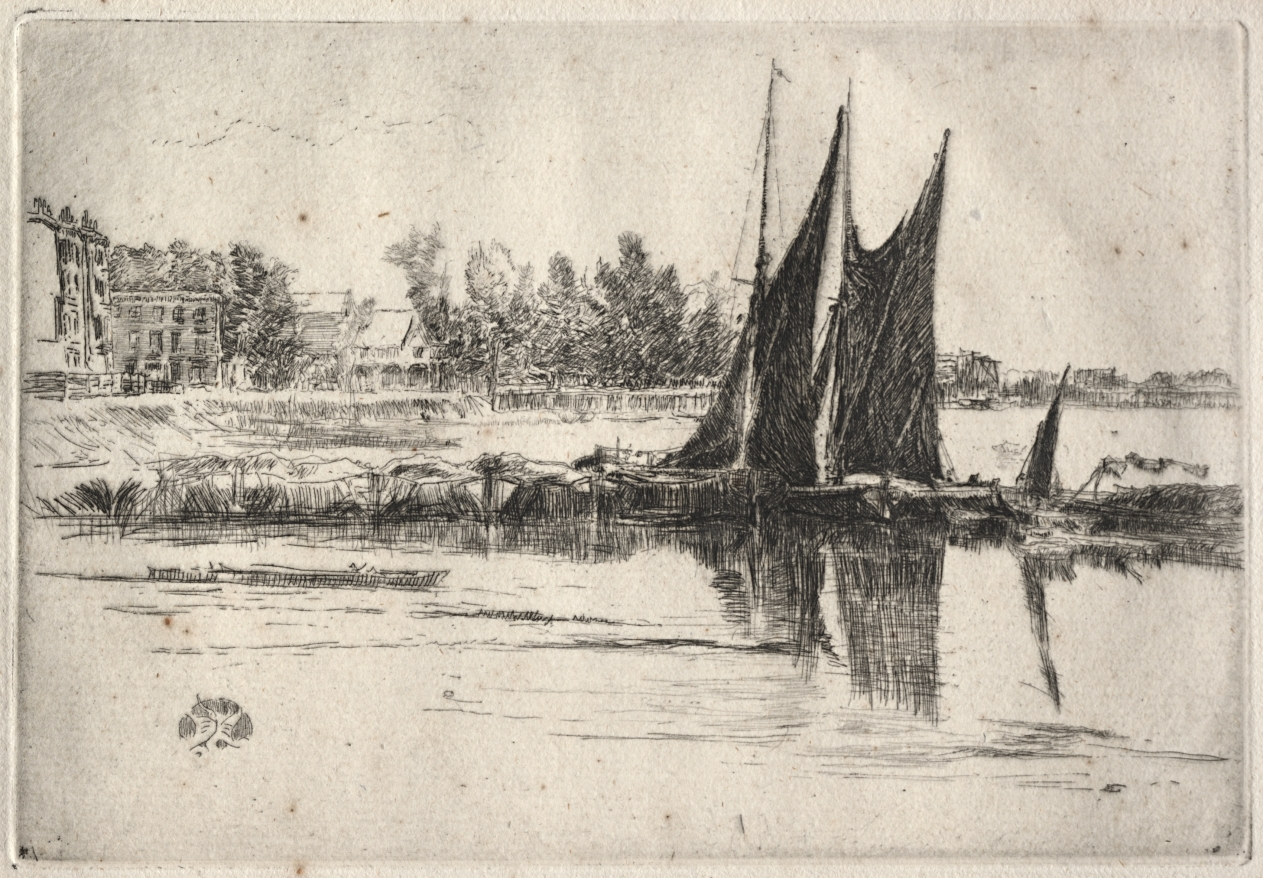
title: Hurlingham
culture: America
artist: James McNeill Whistler (American, 1834–1903)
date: 1879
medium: etching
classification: Print